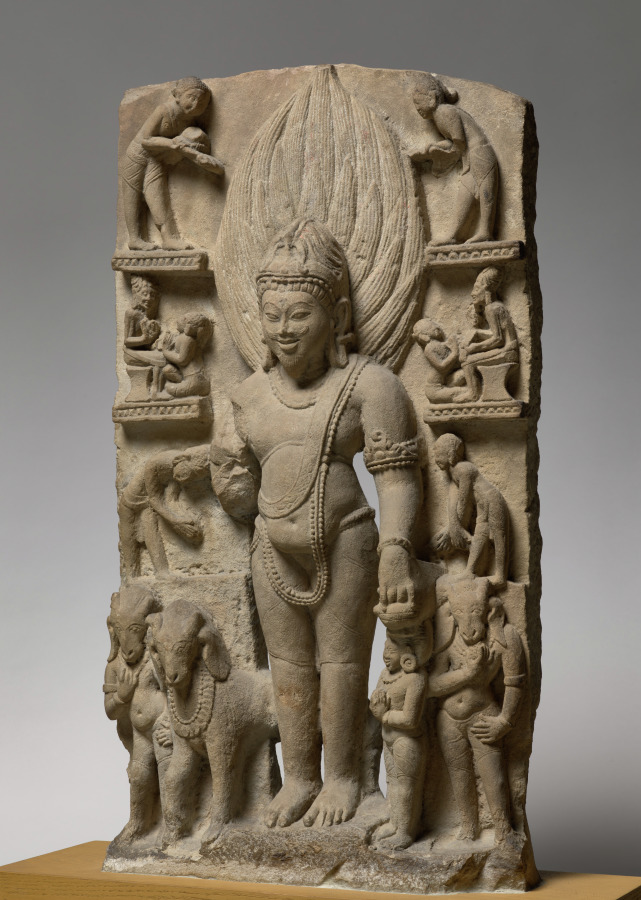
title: Agni, God of Fire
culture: India, Uttar Pradesh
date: c. 1000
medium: sandstone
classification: Sculpture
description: The Hindu god Agni, with flames rising behind him, is the figural form of the sacrificial fire, central to religious practice in India since the early second millennium BC. Agni’s mount is the goat, and together they preside over the Southeast. In the upper registers, Brahmans perform fire sacrifice, preach to disciples, and practice "hot yoga."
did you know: This sculpture is on the cover of the Penguin Classics edition of the Hindu "Laws of Manu."